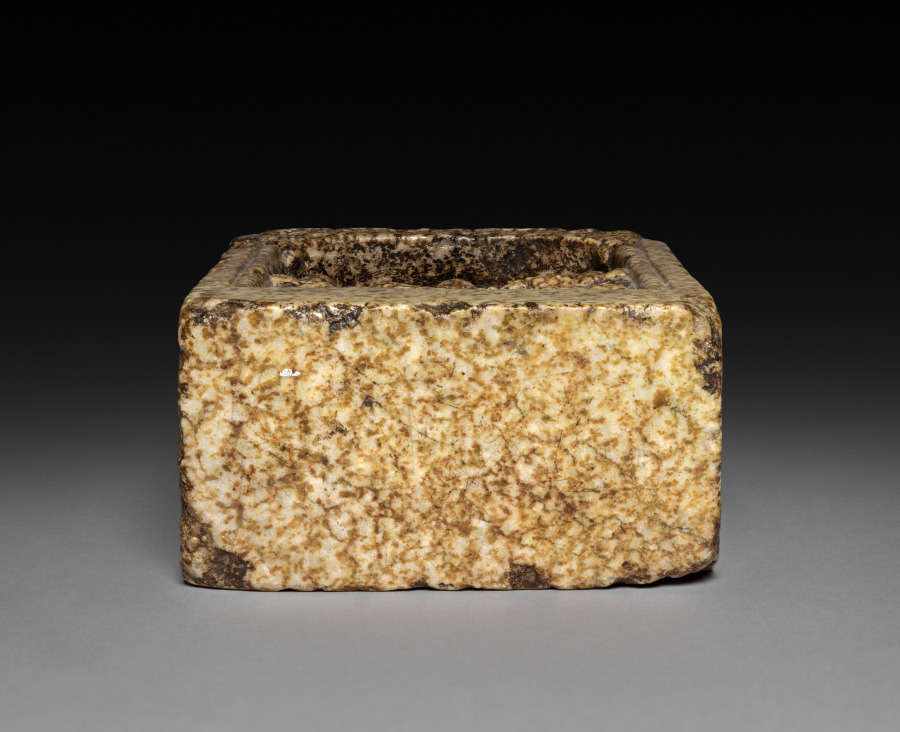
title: Sakyamuni Preaching: A Votive Stele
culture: China, Northern Dynasties period (386–581 CE), Northern Zhou (557-581)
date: c. 565 BCE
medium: Serpentinite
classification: Sculpture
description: The stele shows the historic Buddha Sakyamuni preaching, his lotus throne being flanked by lions, two attendants, and two disciples. There is a date and inscriptions on both sides of the stone.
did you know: Originally the figures and background were painted; traces of red and black remain. The figures’ clothing and some exposed skin were gilded.